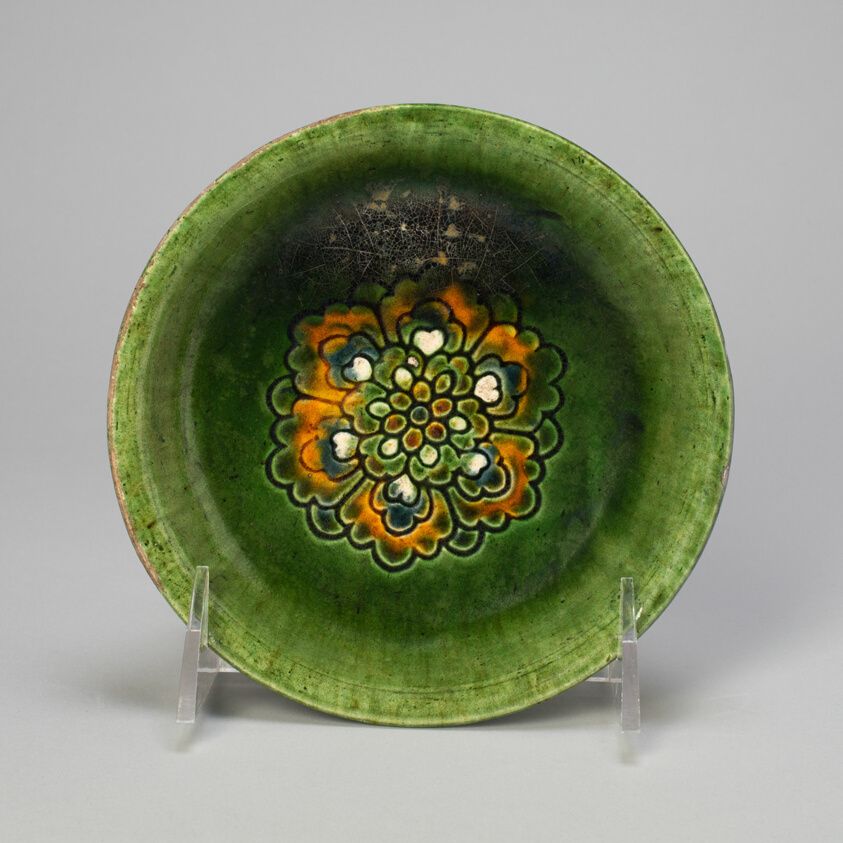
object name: Vessel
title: Shallow Dish with Rosette Design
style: Chinese (culture or style)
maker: China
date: Tang dynasty (618–907), first half of 8th century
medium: Slip-coated earthenware with three-color (sancai) lead glazes and underglaze mold-impressed decoration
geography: China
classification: dish (vessel); earthenware; asian art; ceramics; vessel